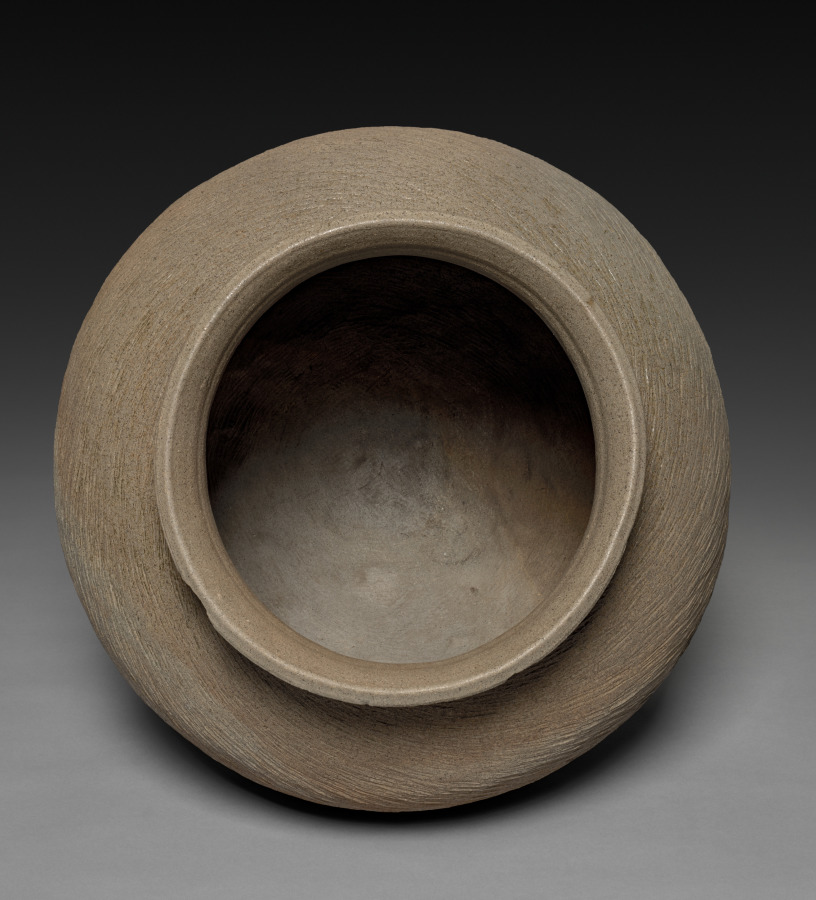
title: Wide-Mouth Jar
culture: Japan, Kamakura period (1185–1333) to Muromachi period (1392–1573)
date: 1300s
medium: Stoneware with impressed and incised decoration (Suzu ware)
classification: Ceramic